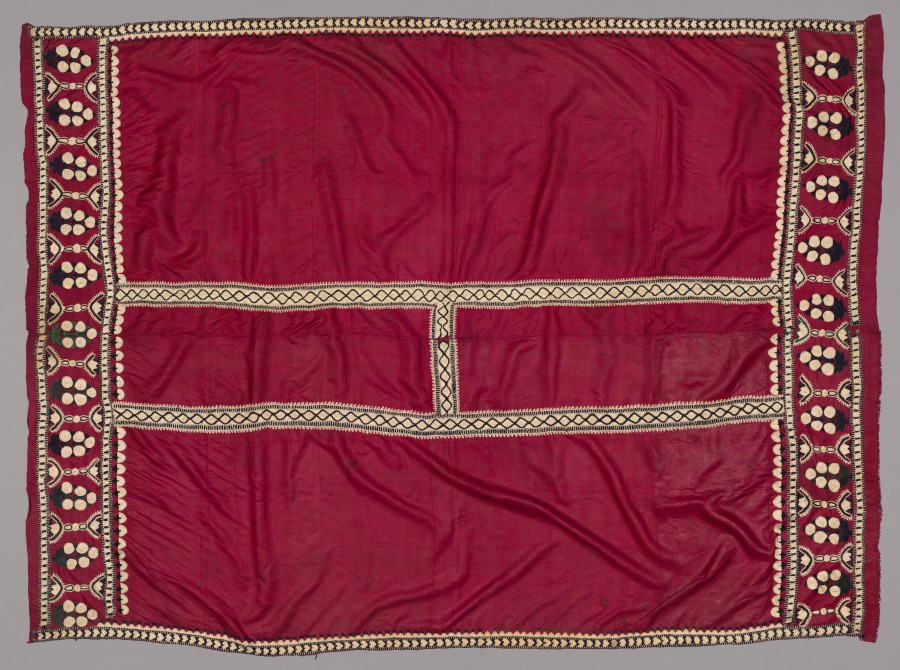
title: Shawl ("Cadar")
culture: Western India, Gujarat, Kachchh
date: 1800s–early 1900s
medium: silk thread on silk ground, embroidery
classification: Textile